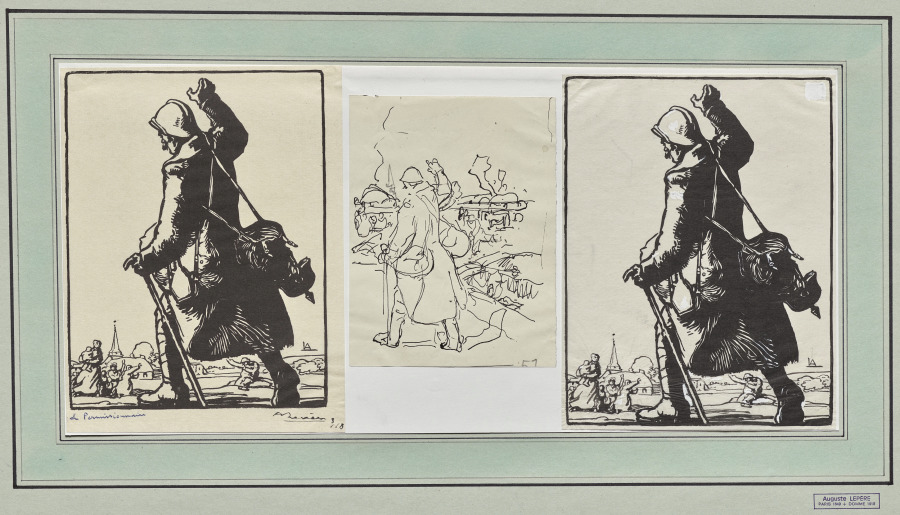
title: Le Permissionnaire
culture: France, 20th century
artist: Auguste Louis Lepère (French, 1849–1918)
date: 1914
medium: pen and ink with traces of pencil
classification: Drawing